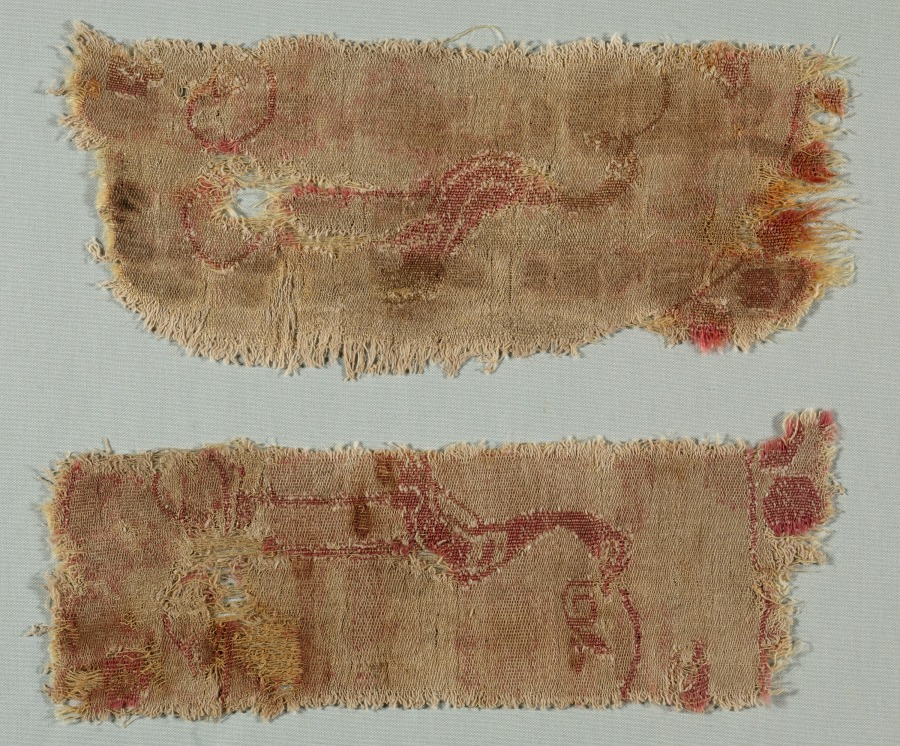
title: Two Fragments of Large Scale Roundel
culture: Iran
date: 600s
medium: compound twill; wool and cotton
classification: Textile